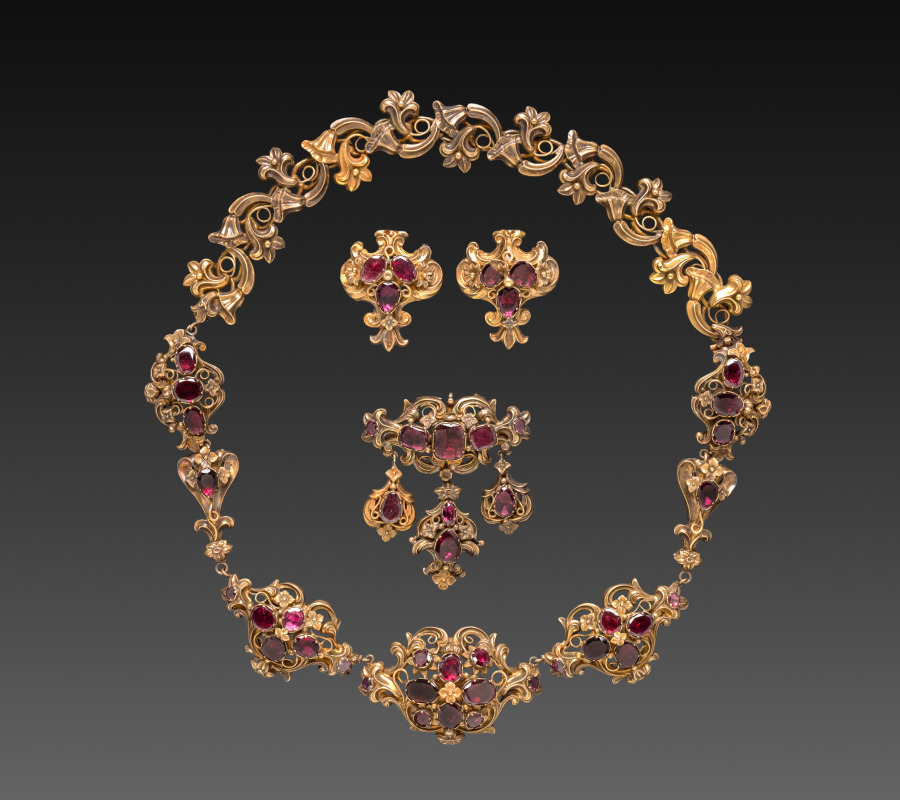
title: Set of Gold Jewelry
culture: Germany, possibly, 19th century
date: c. 1840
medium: gold and jewels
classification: Jewelry